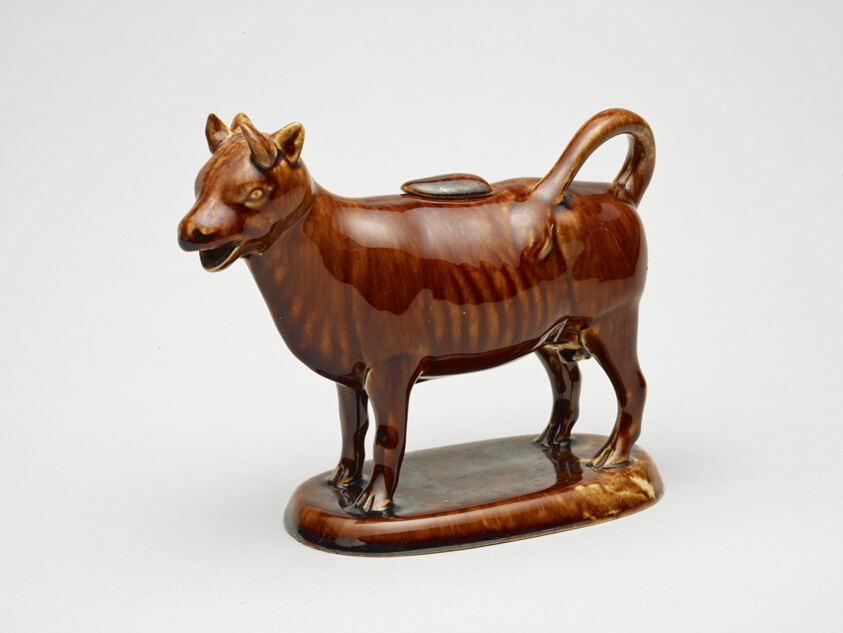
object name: Ceramics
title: Cow Pitcher with Lid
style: Folk Art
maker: Possibly designed by Daniel Greatbatch (American, born England, active 1838–c. 1861); United States Pottery Company (American, 1847–58); Bennington, Vermont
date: c. 1855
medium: Earthenware with glaze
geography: Bennington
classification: creamer; american decorative arts; pottery; ceramics; decorative arts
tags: animals, farm life, cows, dining, drinking